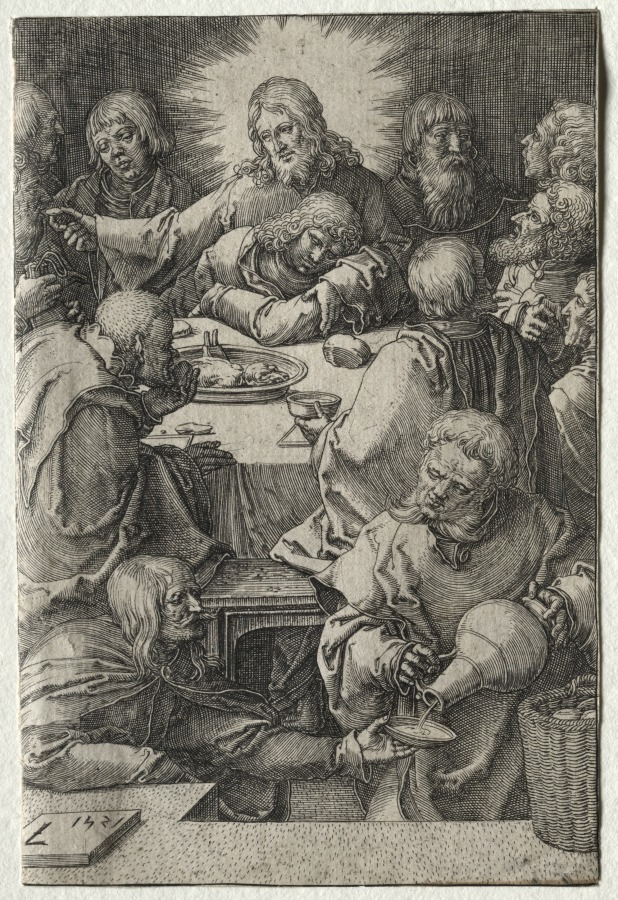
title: The Passion: The Last Supper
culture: Netherlands, 16th century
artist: Lucas van Leyden (Netherlandish, 1494–about 1533)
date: 1521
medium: engraving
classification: Print